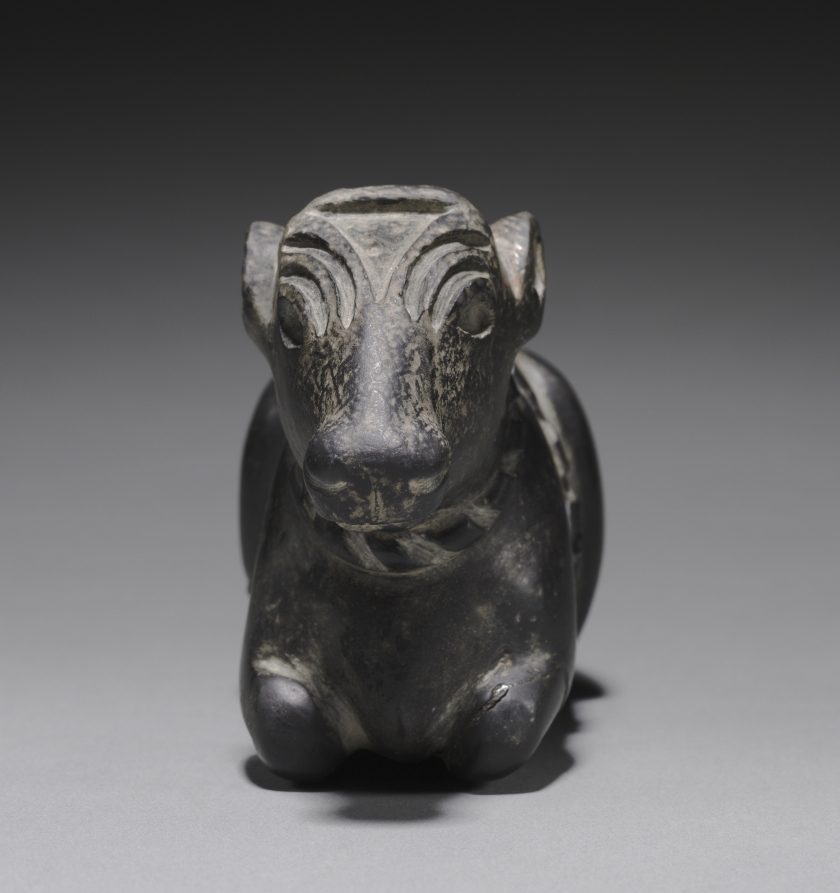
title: Bull Calf Polemount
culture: Sumerian, Iraq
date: c. 2700 BCE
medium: basalt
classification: Sculpture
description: Like most Mesopotamian sculptures in the round, this small bull was an object of worship in a temple. Its eyes, the triangle on the forehead, and the stripes in the rope were originally embellished with contrasting colored stones, or bone. The inlays are lost, but the sculpture itself is one of the very few original cult statues that have survived.